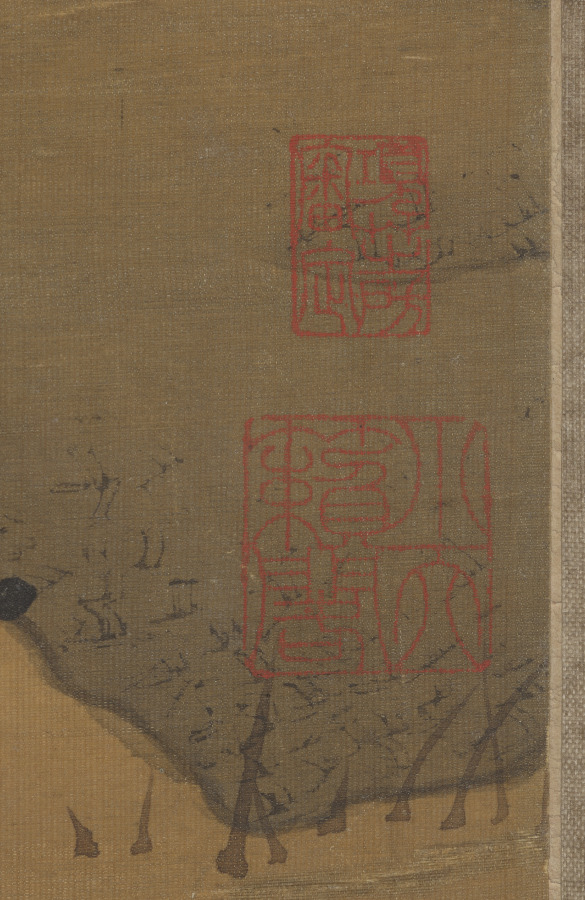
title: Xu Jingyang Moving His Family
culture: China, Ming dynasty (1368–1644)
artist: Cui Zizhong (Chinese, 1574–1644)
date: 1644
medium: Hanging scroll; ink and color on silk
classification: Painting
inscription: Artist's 2 seals: Pei-hai, Cui Zizhong yin.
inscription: 9 additional seals: 2 of Xiang Yuan (18th-19th c.); 1 of Tang Zuomei (late 18th-19th c.); 1 of Zhang Heng 張珩 (1915-1963); 1 of C. C. Wang 王季遷 (1907–2003); 4 unidentified.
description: Xu Jingyang was a dedicated fourth-century Confucian official who allegedly turned into a Daoist immortal. This scroll depicts the legend that when he attained immortality, he took his entire household, including chickens and dogs, to paradise. Cui Zizhong’s painting style intentionally referenced ancient masters. Typical of the pre-Song dynasty landscape tradition, there is the use of blue and green colors and an emphasis on outline rather than texture. While the trembling outlines are reminiscent of earlier painters, the flickering light on rocks and trees is a stylistic feature of Cui’s own time.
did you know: Xu Jingyang, wearing red, is in the upper register of figures, while below his servants transport a rooster, dog, and other supplies.